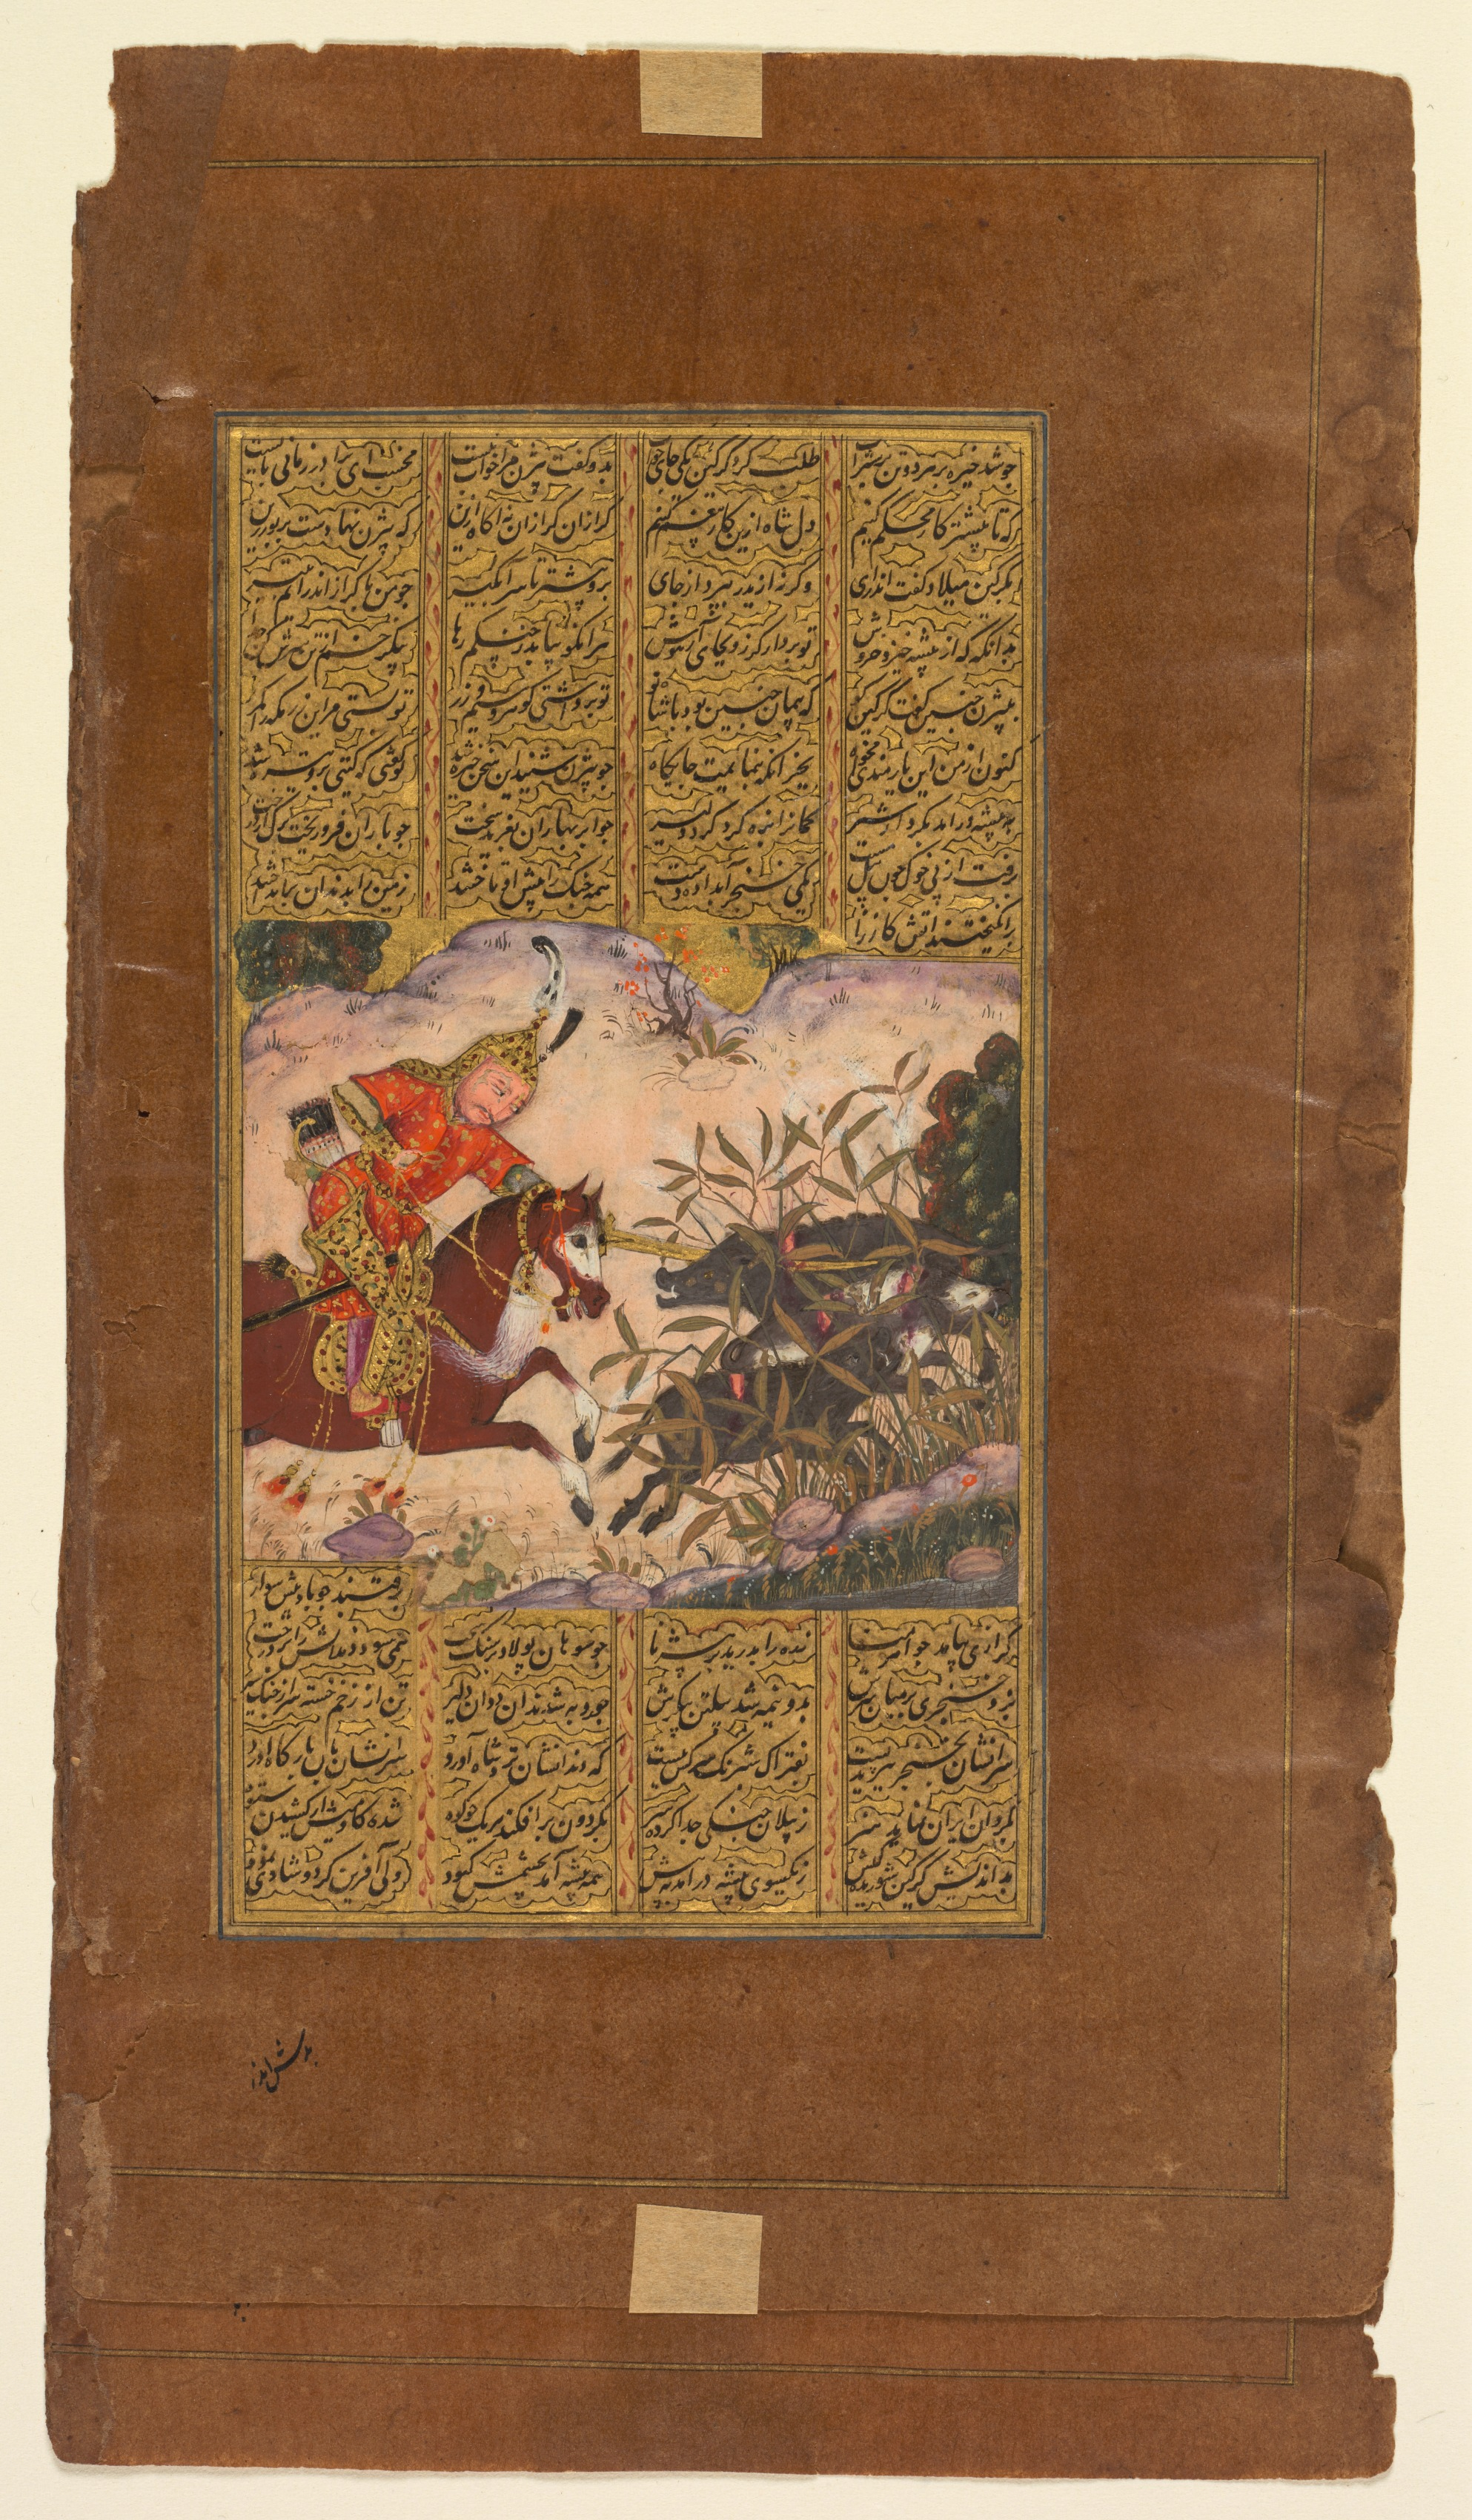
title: Bijan killing the wild boars of Irman, from a Shah-nama (Book of Kings) of Firdausi (Persian, about 934–1020), (recto)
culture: India, Bijapur, Deccan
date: c. 1610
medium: Gum tempera, ink, and gold on paper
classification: Painting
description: This illustrated page from a Shah-nama depicts the first adventure of the hero Bijan, son of an Iranian knight. When reports arrived at the king’s court of wild boars ravaging the borderlands between the enemy realms of Iran and Turan, Bijan volunteered to hunt and kill the beasts, much to the chagrin of his father, who doubted his young son’s ability to navigate the politically volatile situation. The fearless Bijan is shown on horseback as he singlehandedly strikes down on the bodies of the wild boars in the brush. After overzealously celebrating his success, Bijan must be rescued from a pit by Rustam. This early manuscript from the Deccan made for the sultan of Bijapur is characterized by glowing colors and lavish use of gold.